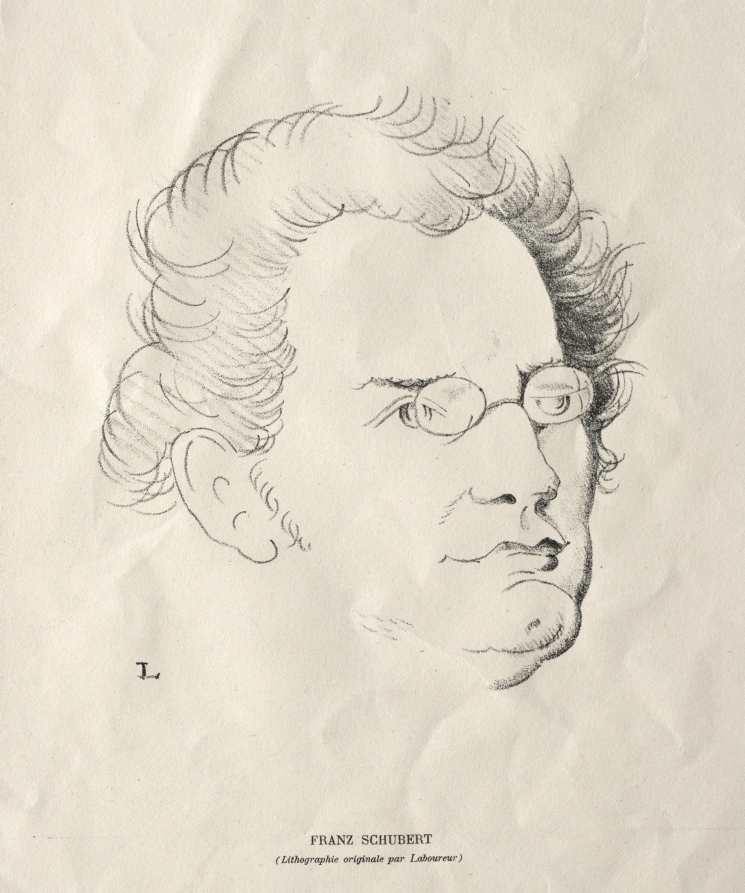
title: Franz Schubert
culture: France, 20th century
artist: Jean-Émile Laboureur (French, 1877–1943)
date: 1928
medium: lithograph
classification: Print